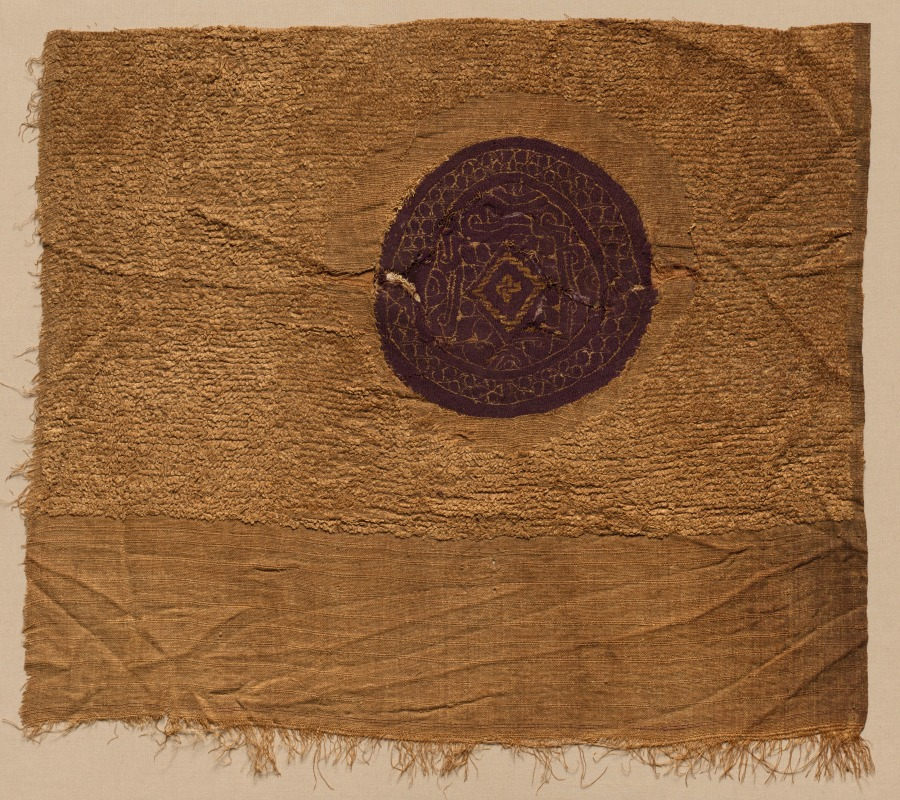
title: Fragment with Gold Foil, from a Furnishing Fabric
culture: Egypt, Byzantine period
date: 300s–400s CE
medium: undyed linen, dyed wool, and gold foil; plain weave with supplementary weft-loops, slit-tapestry weave with supplementary weft wrapping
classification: Textile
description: The rare gold foil and rich purple wool in these two fragments originally enriched a luxurious fabric. Costly gold foil wrapped around a silk core forms the central motif within a diamond, woven in tapestry weave. The surrounding interlacing knot design—achieved with three overlapping squares (in the small fragment) or interlacing squares (in the large fragment)—offered protection from danger and harm. The roundels were woven with extra, or supplementary, linen wefts wrapped on the purple ground. Linen pile loops in the ground fabric resisted abrasion in furnishing fabrics and provided insulation in tunics.